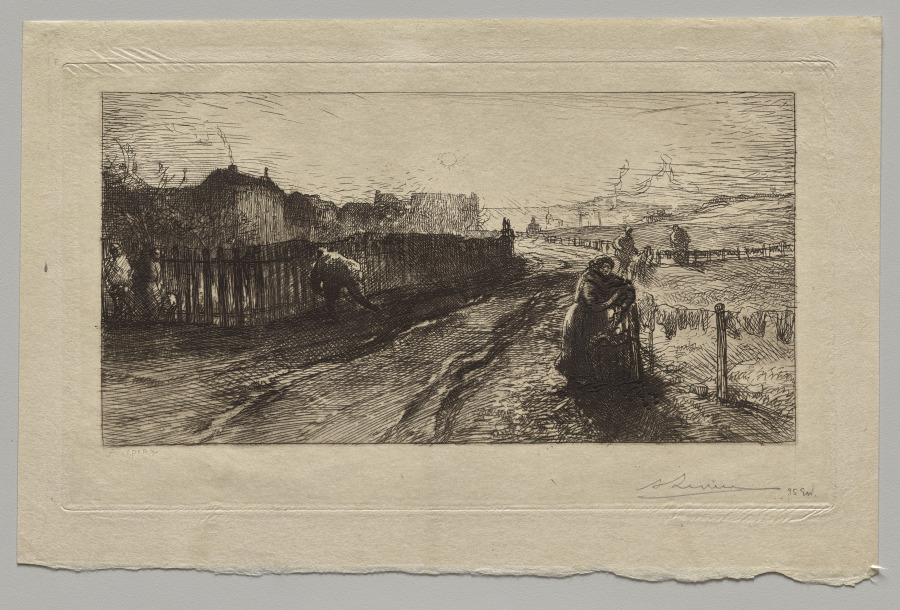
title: At the Fortifications, Porte de Versailles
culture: France, 19th century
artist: Auguste Louis Lepère (French, 1849–1918)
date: 1898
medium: etching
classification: Print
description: Paris underwent a dramatic redesign beginning in the mid-1800s, resulting in its distinctive appearance today but also in the displacement of residents who worked—but could not afford to live—in the city. In this print, Auguste Lepère presented the “zone,” an area on Paris’s periphery where its most economically disadvantaged and disenfranchised inhabitants lived, including some laundresses. Lepère’s image features a laundry line as the singular domestic touch within an otherwise surreal landscape, part of the city but seemingly rural. The inhabitants of the zone used open land to construct makeshift homes without modern amenities, so that they could subsist on the low wages offered by their urban employment.